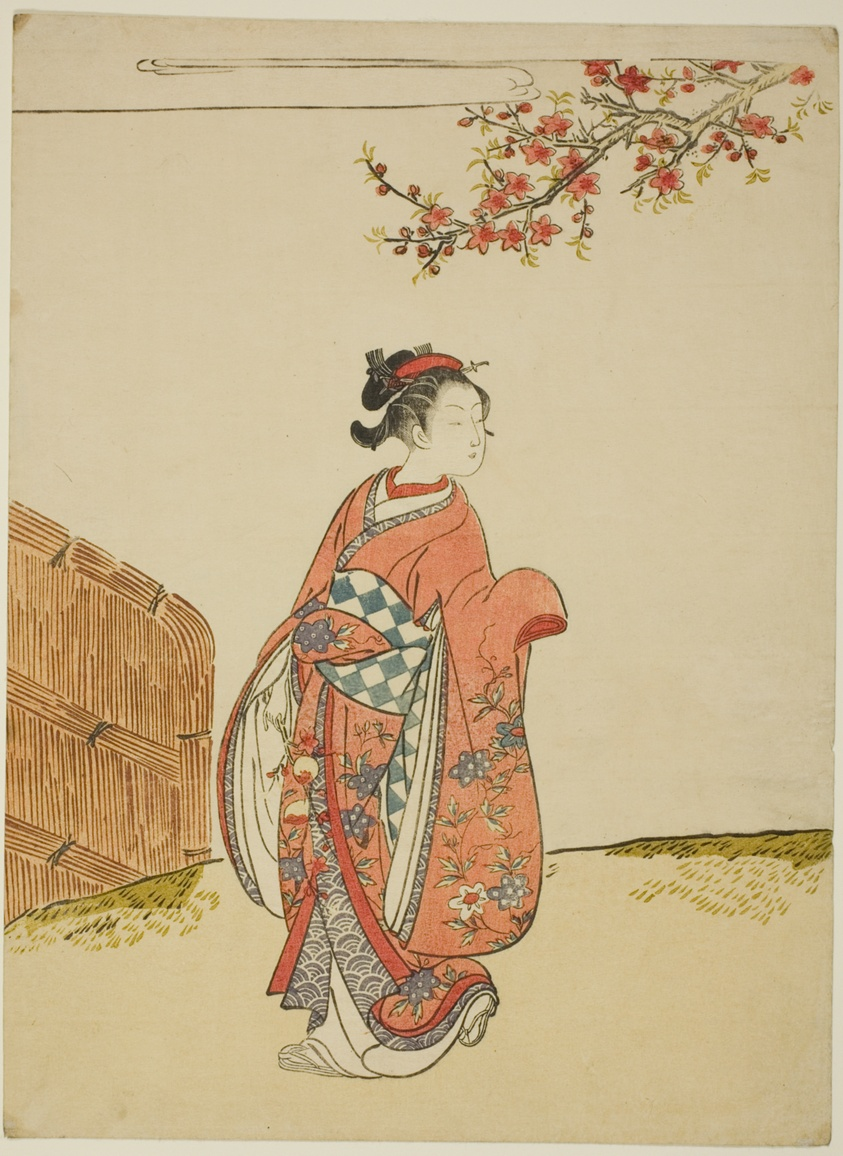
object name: Print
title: Under a Peach Tree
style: Japanese (culture or style)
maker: Suzuki Harunobu 鈴木 春信; Japanese, 1725 (?)-1770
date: c. 1766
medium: Color woodblock print; left sheet of chuban diptych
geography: Japan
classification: woodblock print; print; asian art